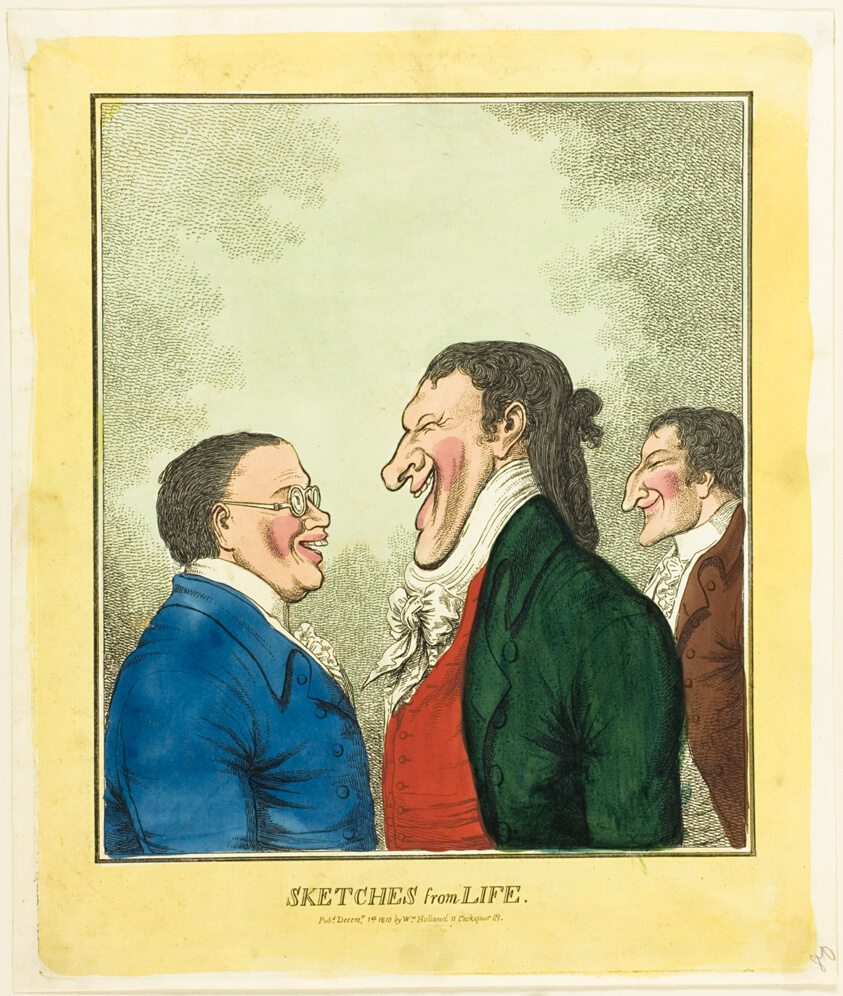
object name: Print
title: Sketches from Life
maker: published by William Holland; English, 1757-1815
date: 1810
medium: Etching, with hand-coloring, on paper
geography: England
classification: etching; print; prints and drawing